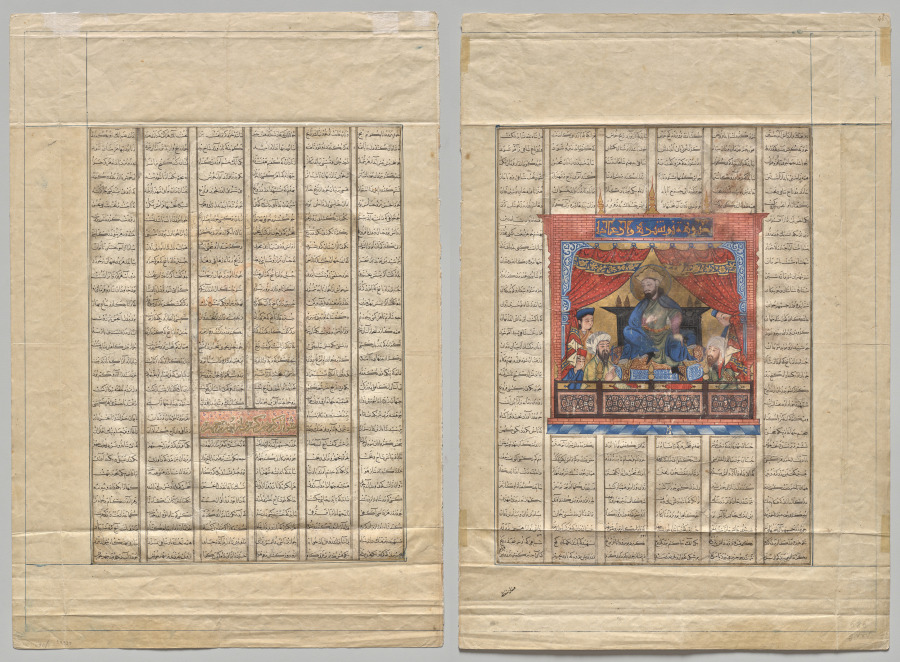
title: Persian Verses: The Fortieth Year of King Kisra Nushirwan's Reign and the Story of Buzurgmihr (recto); Portrait of Nushirwan the Just (verso) from a Shahnama (Book of Kings) of Firdausi (940–1019 or 1025)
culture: Iran, Tabriz, Ilkhanid period (1256-1353)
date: 1330–35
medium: opaque watercolor, ink, and gold on paper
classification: Manuscript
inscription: Script: Naskh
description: Mongol interest in the production of illustrated manuscripts eventually focused on Persian epic poetry. The Shahnama, a compilation of the epics and tales of Iran's legendary heroes, was a natural choice; the book included many subjects that suited Mongol taste, such as banquets, battles, hunting, and magical or fantastic events. Seated on the throne in the center of the painting is the Sasanian ruler of Iran, Khusraw I Anushirwan (531–579), descendant of Bahram Gur. Above the king's head an inscription reads, "Picture of Nushirwan the Just." The figure in the elaborate turban to the left of the king is probably the young Minister Buzurgmihr, famous for his wisdom and virtue. To celebrate the explanation of a troublesome dream by Buzurgmihr, Nushirwan held a series of seven banquets. The text around this painting describes the fifth banquet.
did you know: The Shahnama, a great epic poem in 50,000 verses, traces the history of Iran from legendary times through the Sasanian period.